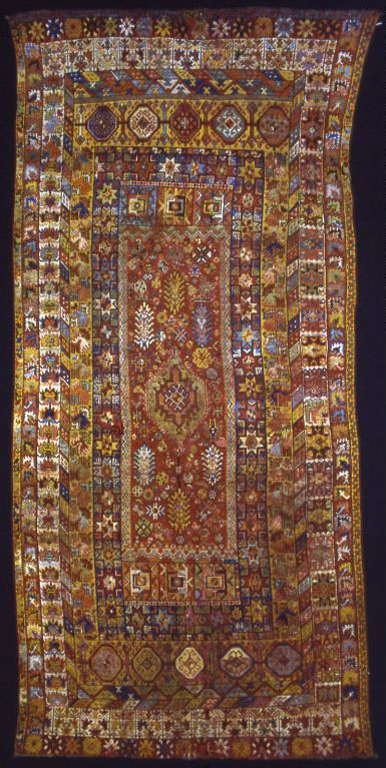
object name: Textile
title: Carpet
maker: Morocco, Rabat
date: 1875–1900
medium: Wool, plain weave with supplementary wrapping wefts forming cut pile through a technique known as "Turkish" (Ghiordes) knots"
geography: Morocco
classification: weaving - carpet; weaving; textile